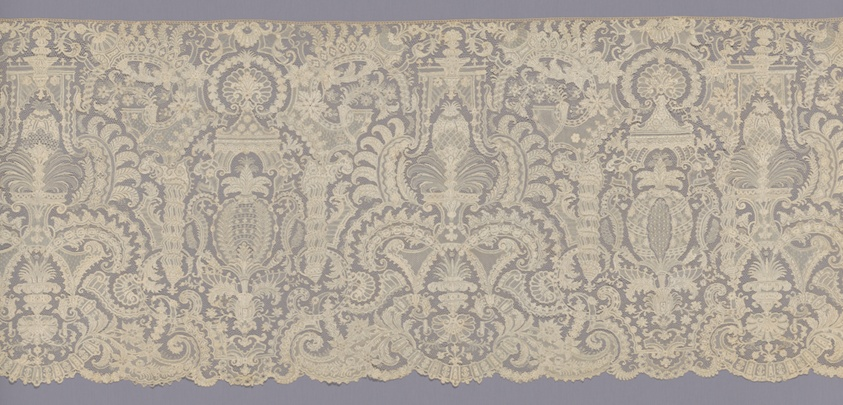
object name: Costume and Accessories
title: Flounce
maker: France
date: 1701/25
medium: Linen, needle lace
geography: France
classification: textile; lace - needle; costume component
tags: fashion, arabesque, cartouches, columns, pineapples